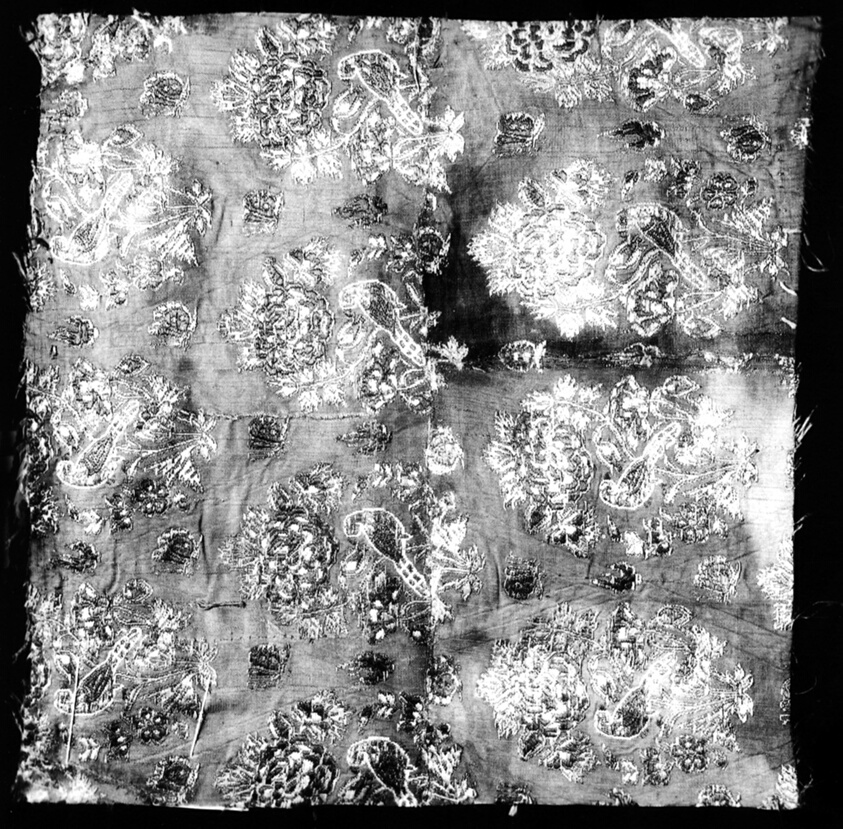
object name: Textile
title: Fragment (Dress Fabric)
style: isfahan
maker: Iran (Isfahan)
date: 18th/19th century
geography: Iran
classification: textile; weaving